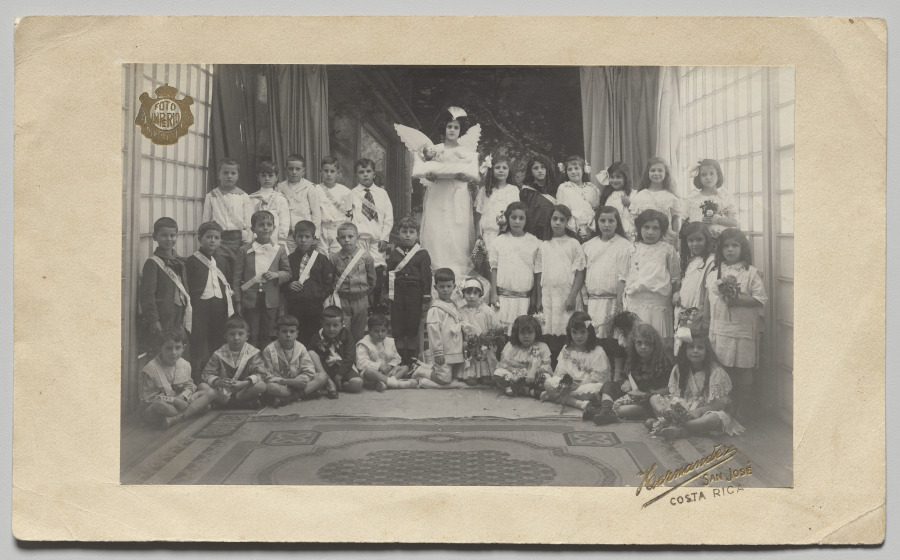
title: Untitled (Semi-Circle of Children, Central Girl Dressed as an Angel Holding the Baby Jesus)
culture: Costa Rica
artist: Andrés and Francisco Hernández (Costa Rican, active c. 1910s–30s)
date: c. 1910s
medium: gelatin silver print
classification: Photograph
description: The Foto Imperio photography studio was run by Andrés and Francisco Hernández in San José, Costa Rica. The brothers also ran a bookstore and print shop, and Francisco was a successful cartoonist, too. Here they artfully arranged 35 children to create a group portrait commemorating a religious event—perhaps a Christmas pageant? The girl dressed as an angel holds a baby, while the girl and boy at her feet seem posed as if for a wedding portrait.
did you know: Portraits are the bread-and-butter business of most photography studios.